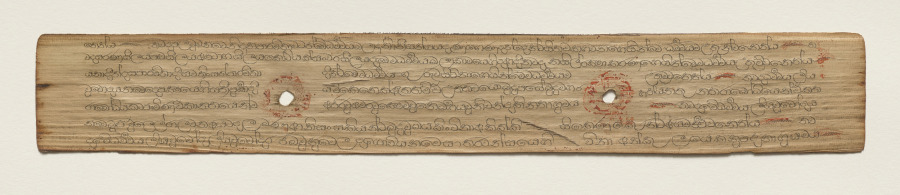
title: Leaf from a Buddhist Manuscript (verso)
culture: Sri Lanka, Singhalese, Late 17th century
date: c. 1700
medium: fiber paper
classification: Manuscript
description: Palm leaf material is still used for manuscripts in Sri Lanka. The palm leaves are prepared first by boiling them, drying them in the sun, and then rubbing them with oils. Scribes then use a metal stylus to incise the text. Then charcoal powder is wiped across the pages, filling in only the inscribed lines.